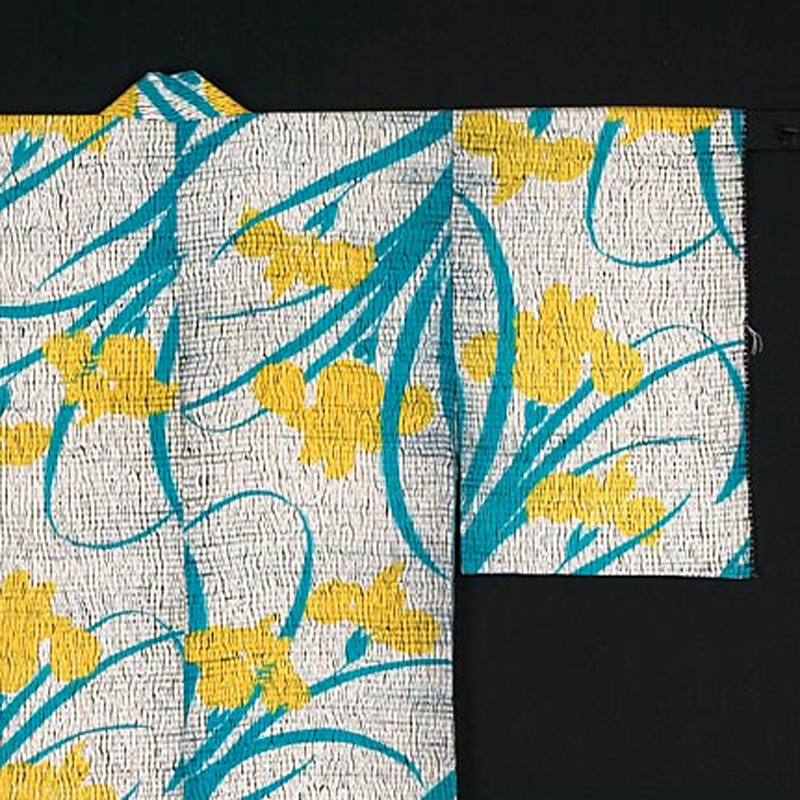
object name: Textile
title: Summer Kimono (Hitoe)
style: meiji, Japanism, East Asian, asian, taisho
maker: Japan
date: About 1900–1916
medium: Silk, plain weave self-patterned by rows of gauze crossings (yoko-ro); resist- dyed (shibori) and stenciled (kata yûzen-zome)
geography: Japan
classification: weaving - printed; textile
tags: fashion, flora